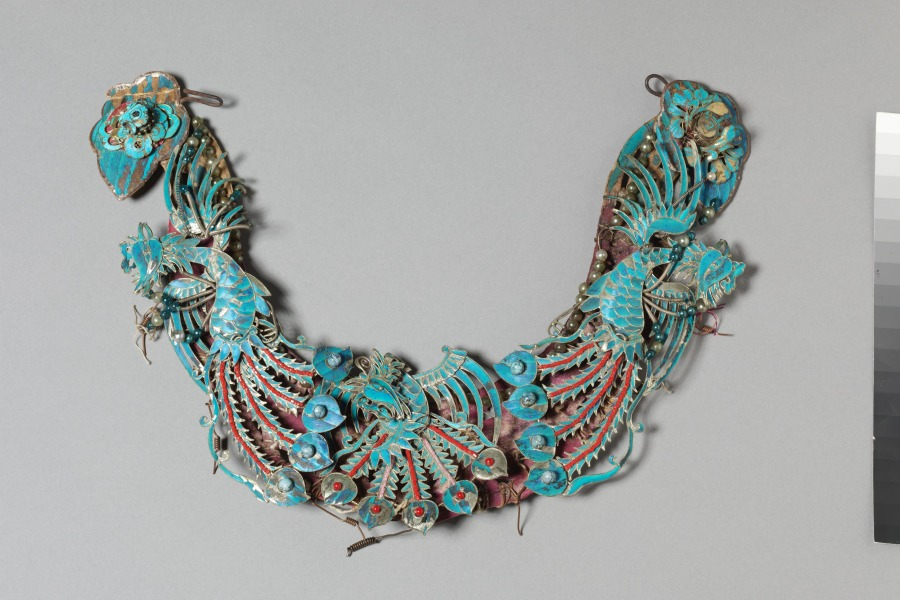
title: Set of Headdress Ornaments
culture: China, Qing dynasty (1644-1911)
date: 1700s or 1800s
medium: Copper-silver alloy, gilding, kingfisher feathers, glass beads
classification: Jewelry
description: Hair ornaments depicting flowers, butterflies, or birds were worn by ladies of the Manchu elite class.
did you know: The iridescent blue feathers of kingfisher birds are inlaid in hairpins and headdresses.